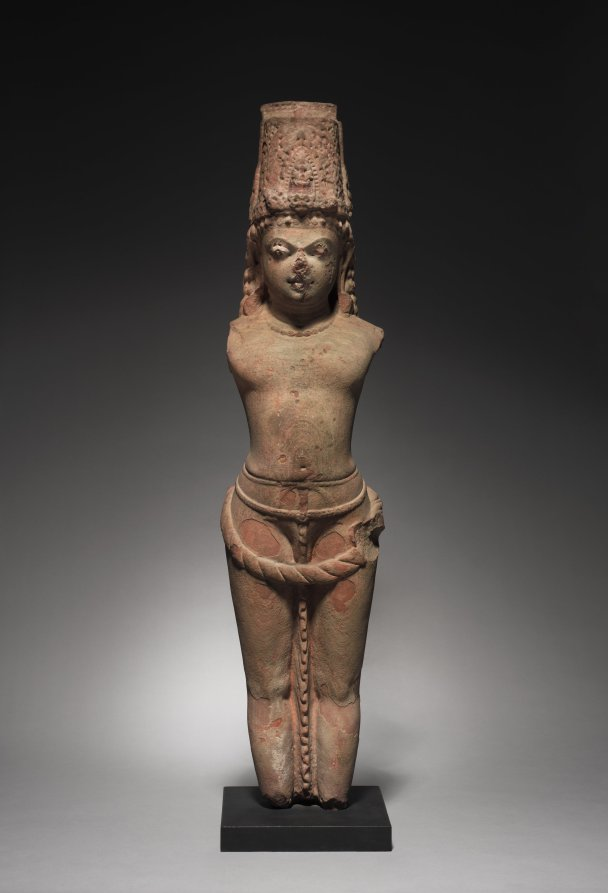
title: Standing Vishnu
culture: Northern India, Mathura, late Gupta Period (320-647)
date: late 500s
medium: red sandstone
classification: Sculpture